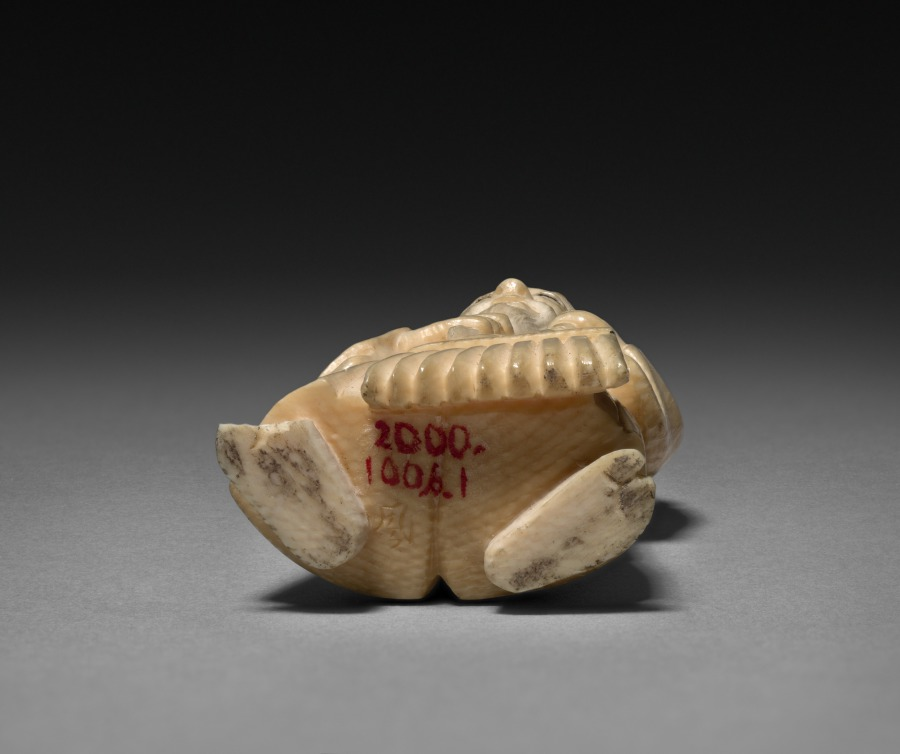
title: Japanese Man with Rake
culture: Japan, Meiji period (1868–1912)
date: early 1900s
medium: ivory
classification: Ivory